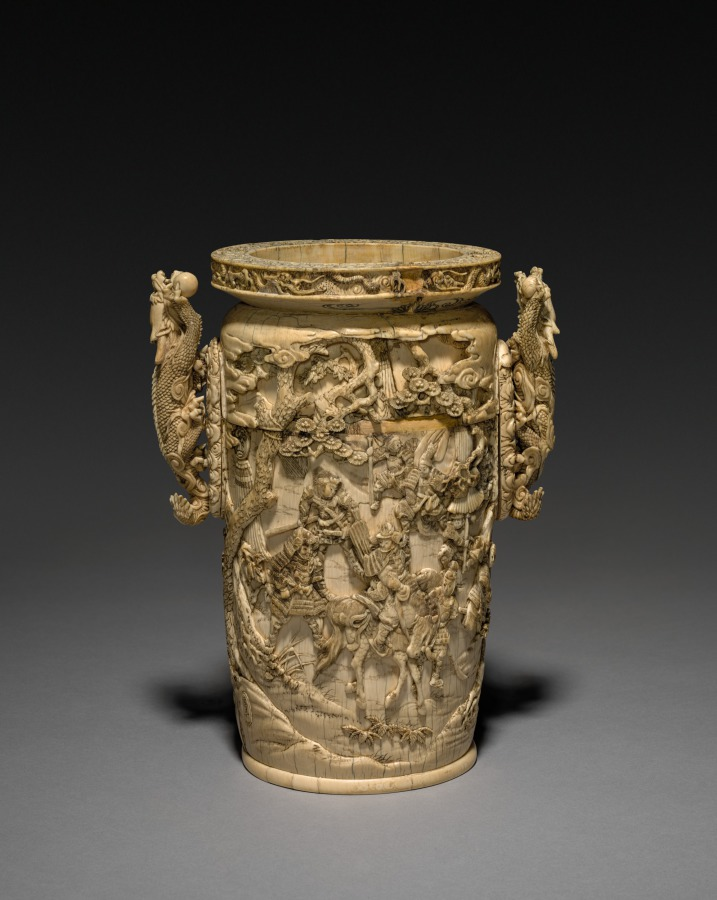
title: Vase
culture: Japan, Edo period (1615–1868) to Meiji period (1868–1912)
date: 1800s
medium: ivory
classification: Ivory